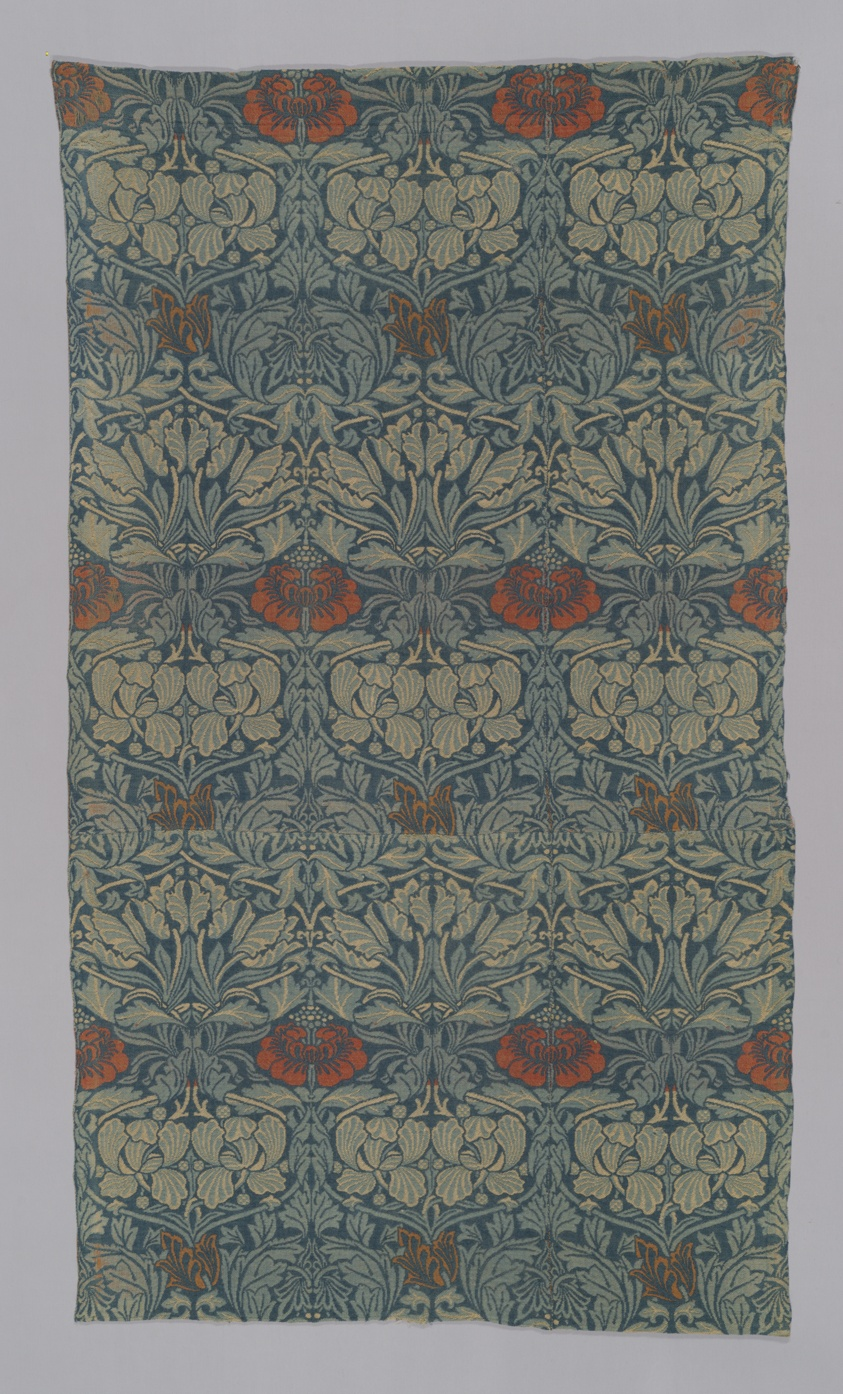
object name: Textile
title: Tulip and Rose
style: Arts and Crafts Movement, british, 19th century, 20th Century, British Arts and Crafts Movement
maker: Designed by William Morris (English, 1834–1896); Produced by Morris & Co., London (English, 1875–1940); Probably woven by Heckmondwike Manufacturing Company, Yorkshire (English, founded 1873)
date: Design 1876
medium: Four panels joined: wool, plain weave triple cloth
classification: textile; weaving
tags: floral, foliage, botanical